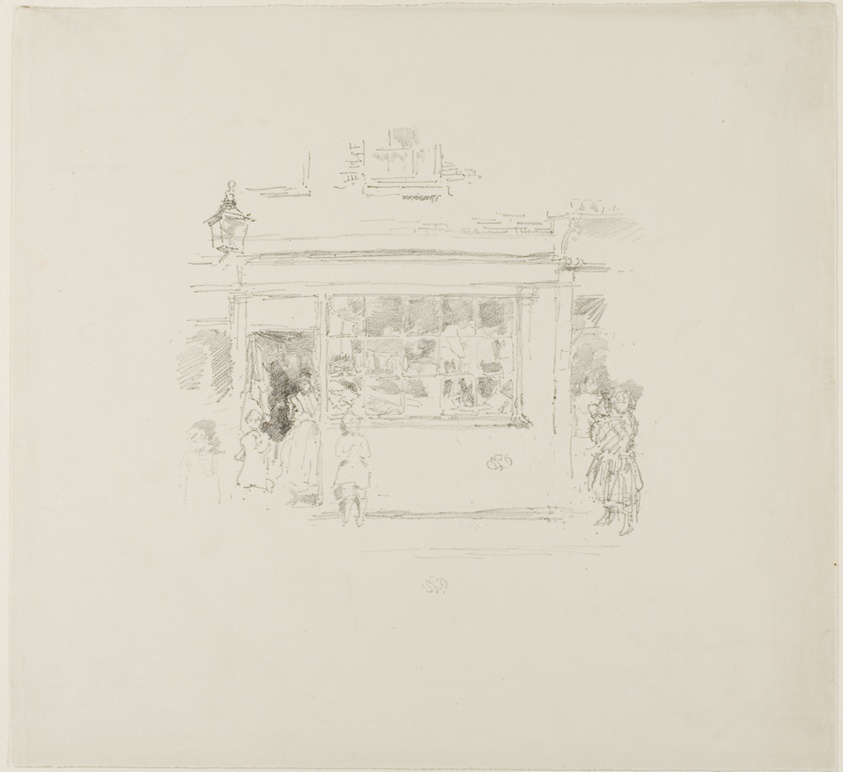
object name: Print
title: Drury Lane Rags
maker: James McNeill Whistler (American, 1834-1903); printed by Thomas Way (English, 1837-1915)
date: 1888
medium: Transfer lithograph in black on grayish ivory wove proofing paper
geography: United States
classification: transfer lithograph; lithograph; print; prints and drawing; paper